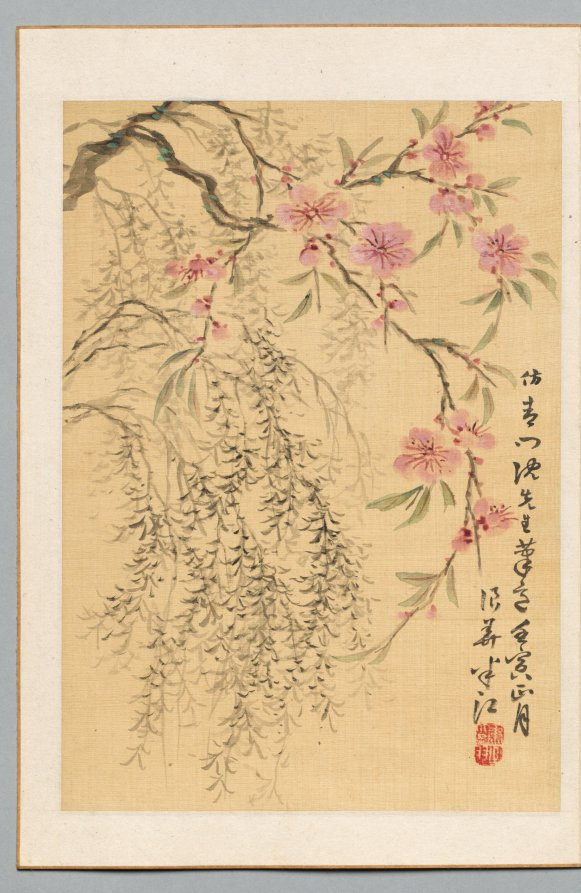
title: Peach Blossoms and Willows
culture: Japan, Edo period (1615–1868)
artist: Okada Hankō (Japanese, 1782–1845)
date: 1842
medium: leaf from a pair of folding albums; ink and color on silk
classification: Portfolio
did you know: Okada Hankō's life was marked by the loss of his library of books and paintings to a fire caused by a rebellion in his home city of Osaka.